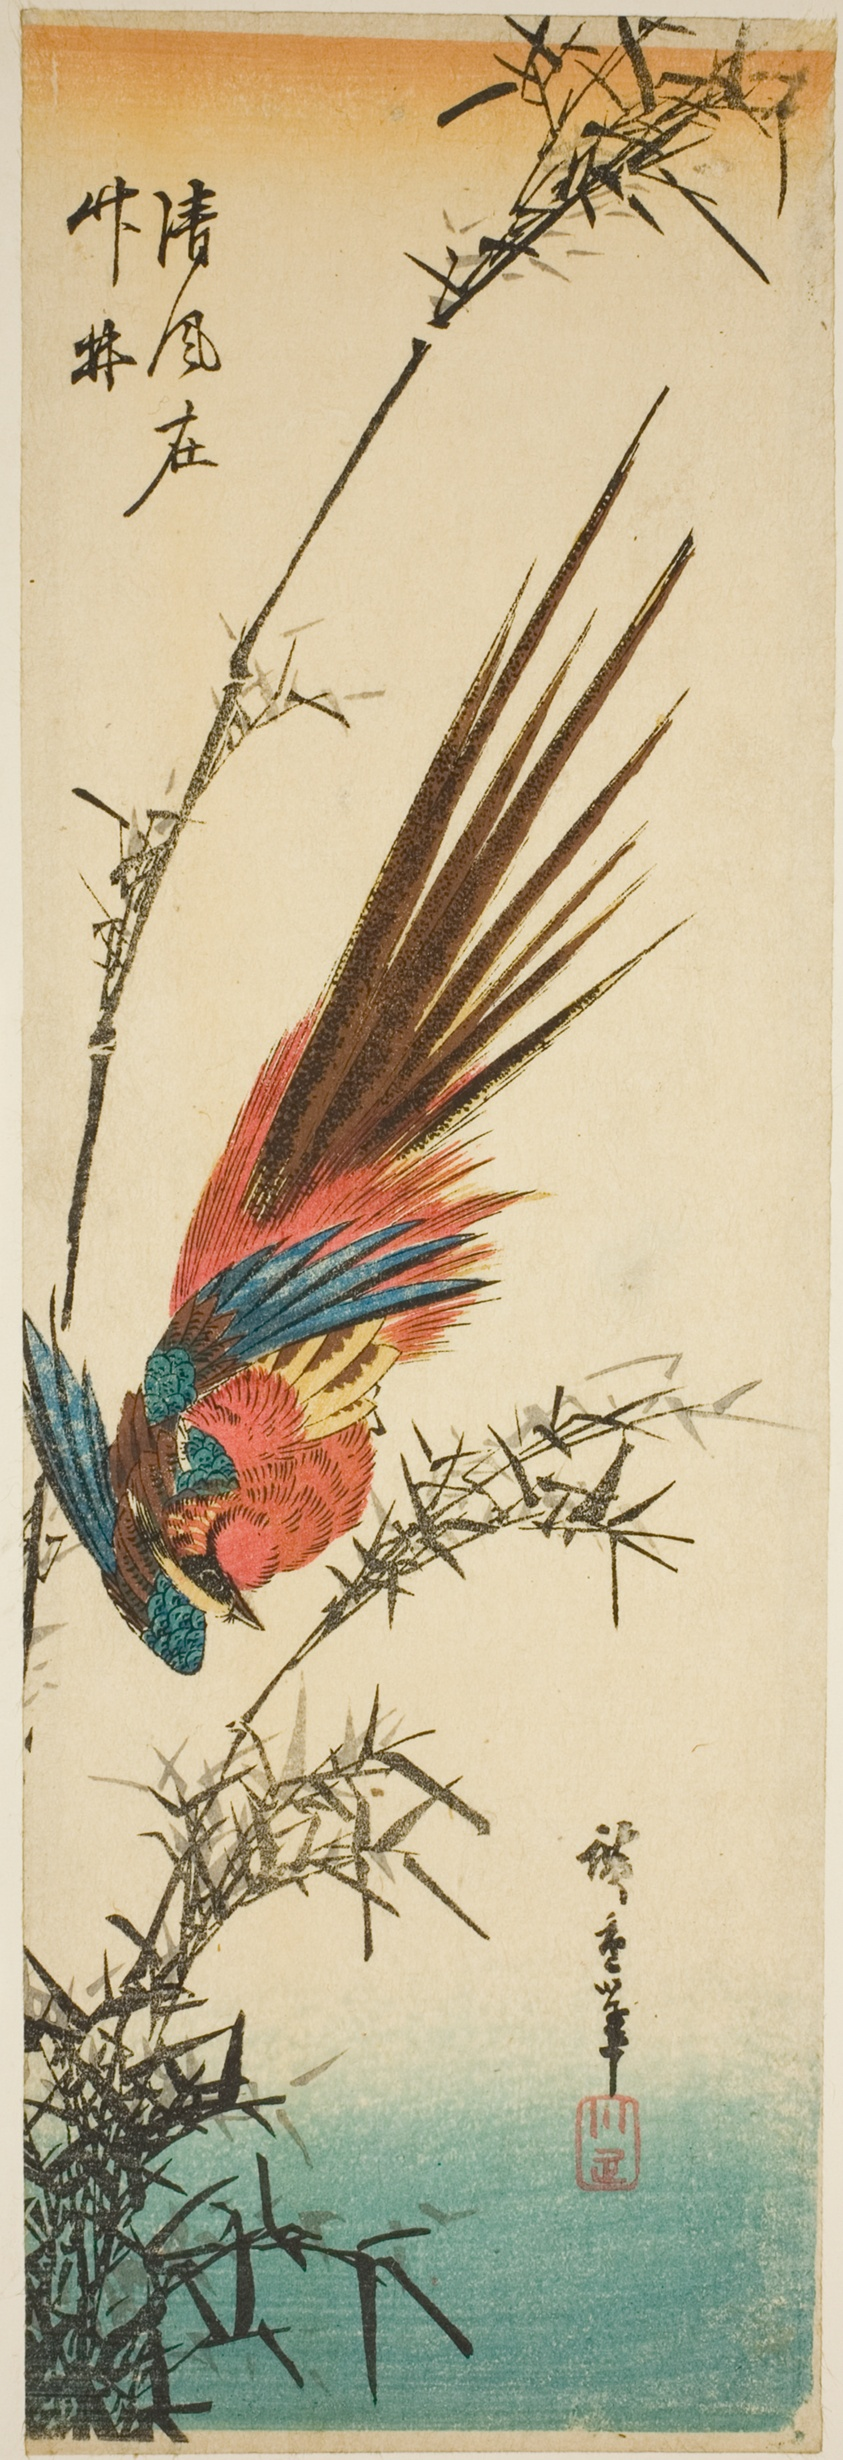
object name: Print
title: Copper pheasant and bamboo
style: Japanese (culture or style)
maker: Utagawa Hiroshige 歌川 広重; Japanese, 1797-1858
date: 1840s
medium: Color woodblock print; aitanzaku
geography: Japan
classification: woodblock print; print; asian art